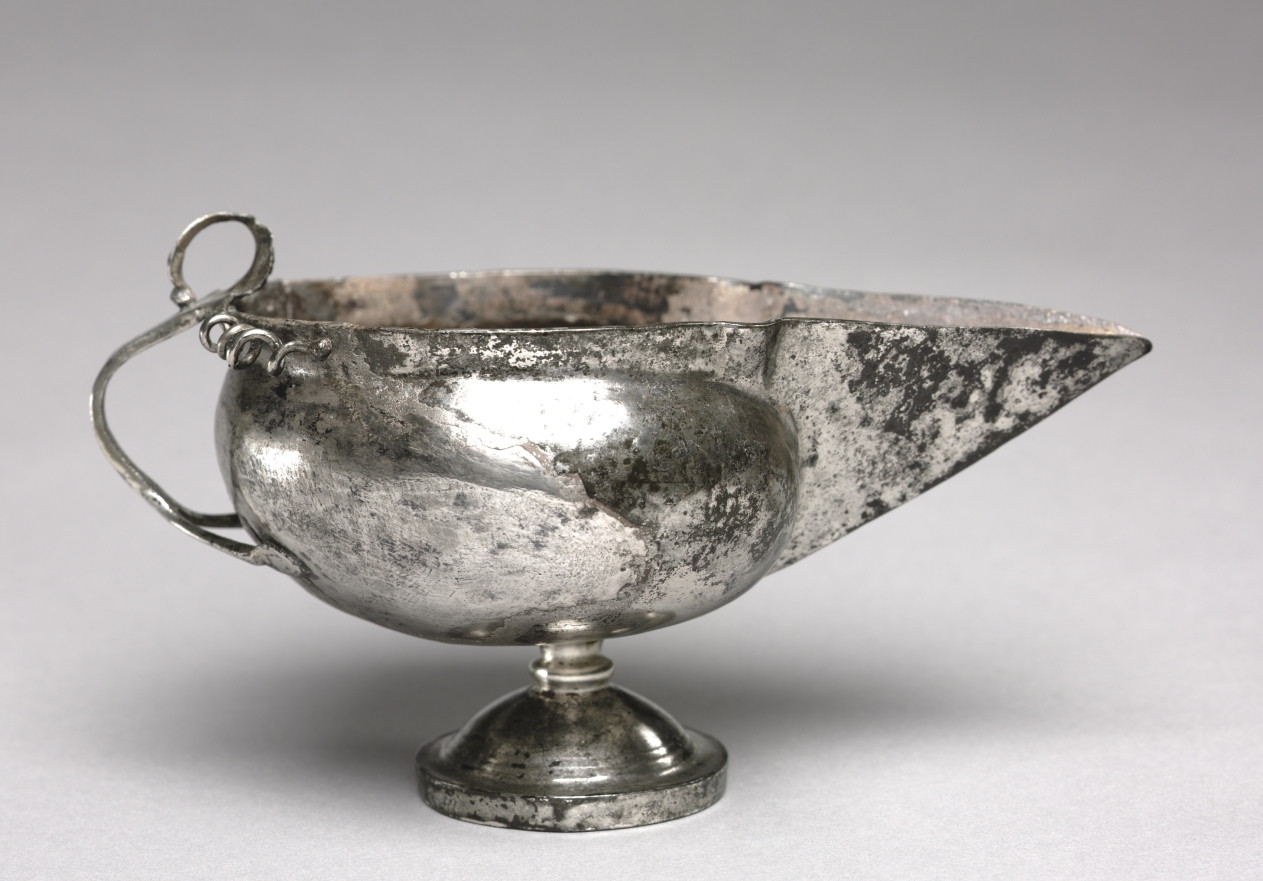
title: Spouted Pitcher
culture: Byzantium, Syria(?), Byzantine period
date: 300–600 CE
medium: silver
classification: Metalwork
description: A large quantity of tableware survives from the Roman Empire, including this piece from Antioch and the Eastern Mediterranean. Most of the recovered groups of silver seem to have been hoards concealed during times of trouble. A complete table service, called a ministerium in Latin and a synthesis in Greek, consisted of silver for eating and drinking: trays, platters, plates, dishes, spoons, pepper dispensers, goblets, pitchers, ladles, and bowls. The god of wine, Dionysos, was frequently depicted on drinking and eating vessels.